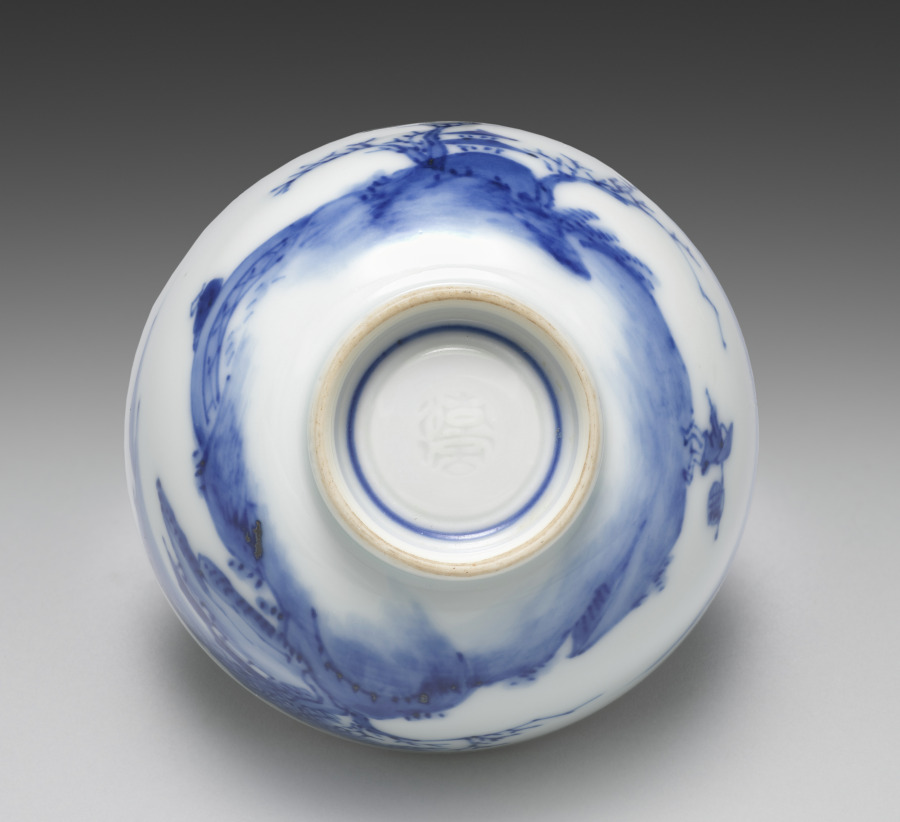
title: Teacup from Tea Set with Chinese Landscape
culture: Japan, Meiji period (1868–1912)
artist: Seifū Yohei III (Japanese, 1851–1914)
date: c. 1893–1914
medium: Porcelain with underglaze blue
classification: Ceramic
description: The theme of this sencha tea set is the Chinese scholar-recluse in an idyllic landscape. Each of the five teacups has a landscape with an architectural structure and some human activity. This tea set has a side-handled pot called a kyūsu, used for steeping, straining, and serving tea. Unlike some others, this set also has a yuzamashi, a container used to cool boiled water to just the right temperature for the best flavor when steeping. Seifū Yohei III’s painting teacher, Tanomura Chokunyū (1814–1907), made a visual record of famous sencha events that shows how these kinds of porcelains fit with objects such as a stove and kettle to form a complete set of utensils for tea preparation, and with ensembles of decorative objects meant to inspire creativity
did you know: A fourth cup shows a humbly dressed man with a broad-brimmed hat lugging a package tied to the end of a rod slung over his shoulder. In front of him is a two-story building flanked by deciduous trees and a man resting against the side of a sturdy stone bridge as he looks at a residence, or perhaps a set of roofed gates, further up the path.